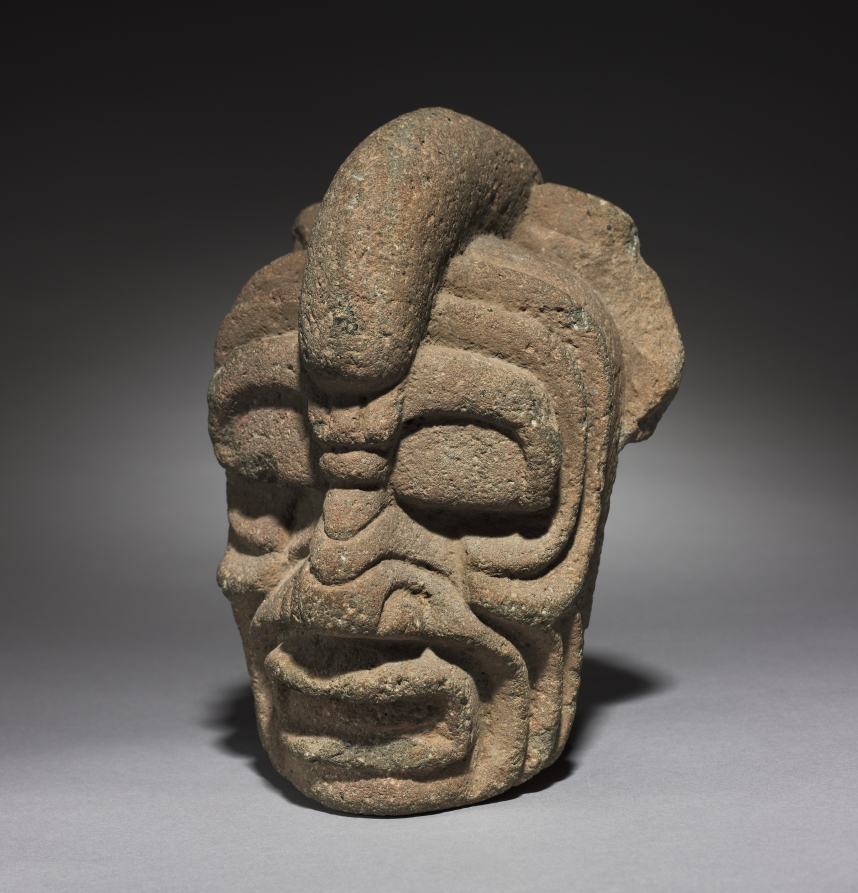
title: Ballgame Stone Head (Hacha)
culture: Mesoamerica, Classic Veracruz style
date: 450–550 CE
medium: gray volcanic stone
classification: Sculpture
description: Little can be said about this head’s identity and meaning, although the deep, dramatic furrows that line the face suggest age and the crest that curves across the top of the head has been compared to that of a bird. Such heads were one element of the regalia used in an ancient ballgame associated with complex mythology and equally elaborate art production on Mexico’s Gulf Coast, in present-day Veracruz.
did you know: This head’s identity is unknown but the deep furrows on the face suggest age.